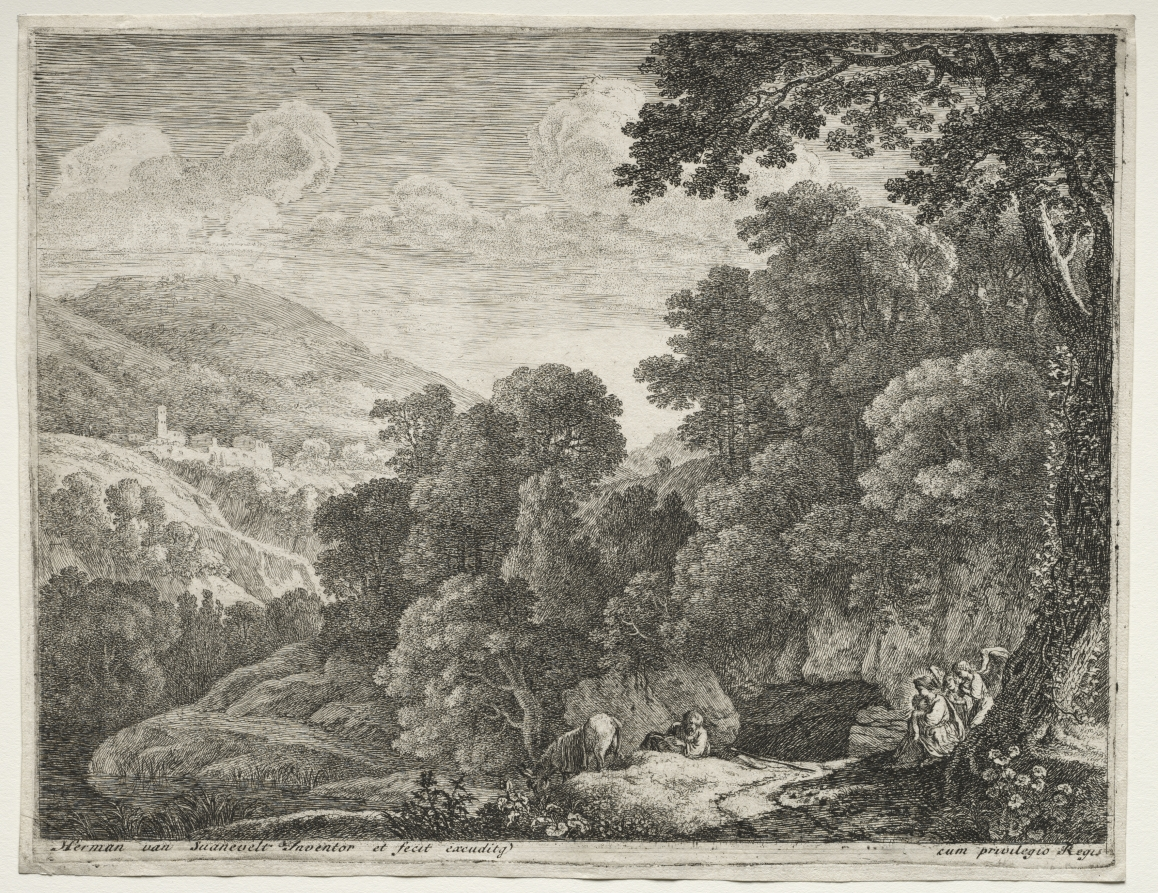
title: The Flight into Egypt: The Cave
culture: Netherlands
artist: Herman van Swanevelt (Dutch, c. 1600–1655)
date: c. 1652–54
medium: etching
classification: Print